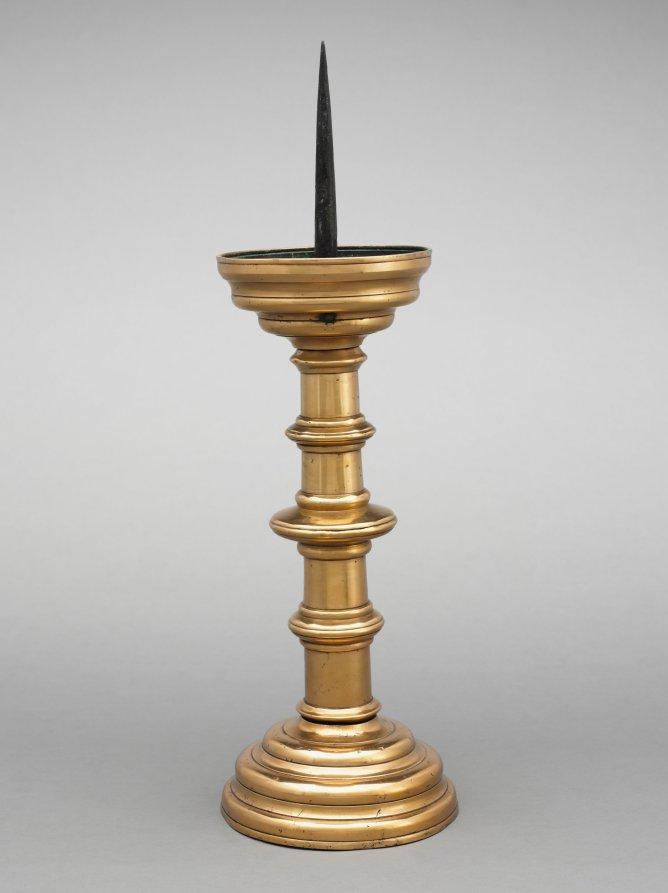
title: Pricket Candlestick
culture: South Netherlands, Valley of the Meuse, 16th century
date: early 1500s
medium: brass (hollow cast in three parts) and iron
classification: Metalwork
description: This object is an example of a type of metalwork known as "dinanderie," produced in and around the town of Dinant on the River Meuse in the Belgian province of Namur. Late medieval Dinant specialized in the production of these finely cast and finished objects in brass alloy, supplying aquamanilia, candlesticks, patens, basins, baptismal fonts, and other altar furniture throughout the Meuse Valley and for export beyond.